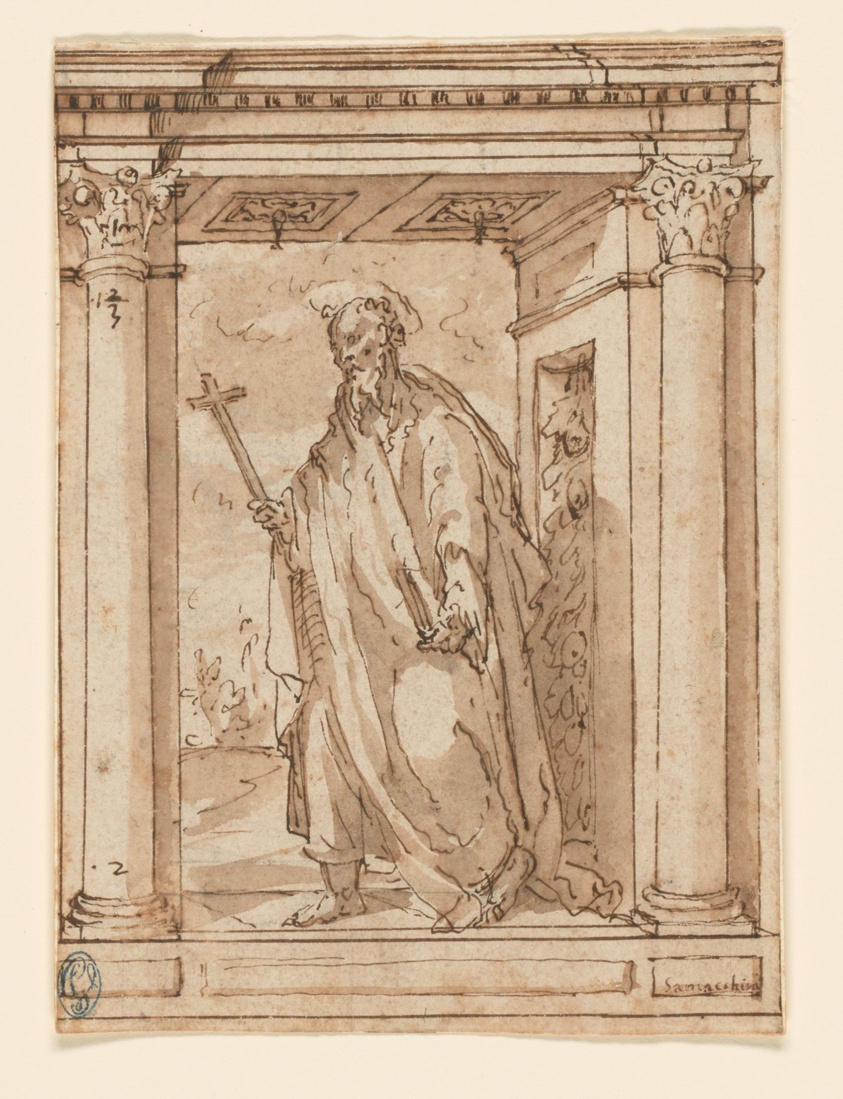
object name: Drawing and Watercolor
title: Standing Saint in Portico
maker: Unknown artist; Italian, second half of the 16th century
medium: Pen and brown ink and brush and brown wash, over traces of black chalk and graphite, on ivory laid paper, laid down on ivory laid paper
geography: Italy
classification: drawings (visual works); paper; prints and drawing